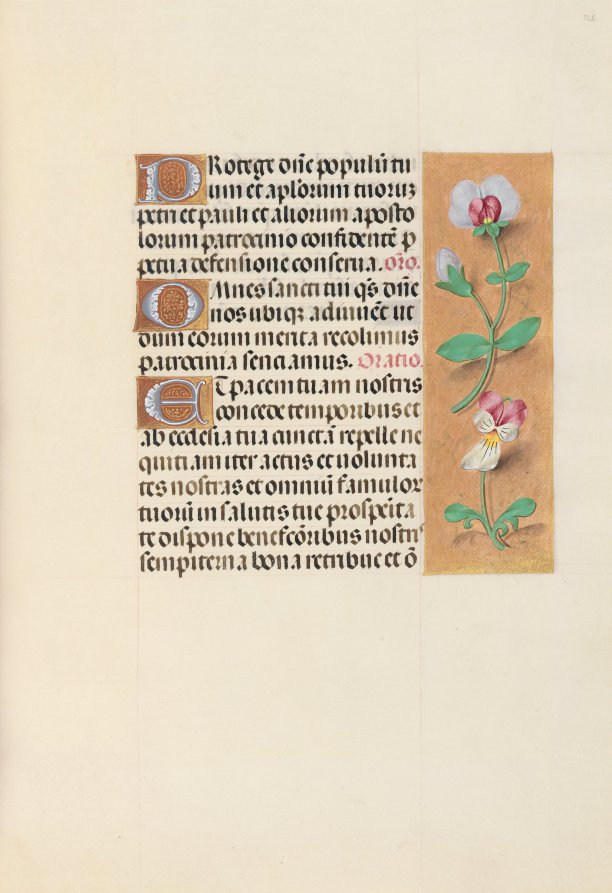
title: Hours of Queen Isabella the Catholic, Queen of Spain: Fol. 125r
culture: Flanders, Ghent and Bruges, late 15th century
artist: Master of the First Prayerbook of Maximillian (Flemish, c. 1444–1519)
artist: and Associates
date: c. 1500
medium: ink, tempera, and gold on vellum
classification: Bound Volume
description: This manuscript was illuminated by a circle of at least five highly organized manuscript painters active in the Flemish cities of Ghent and Bruges. The principal illuminator was Alexander Bening, who painted the majority of the book's miniatures. Manuscripts produced by this circle of artists are renowned for the decoration of their borders, which typically feature a rich variety of realistically-painted flowers, birds, and butterflies. This prayer book, called a book of hours, was intended not for a cleric, but for the private devotions of a lay person-in this case, Isabella the Catholic, Queen of Spain (1451-1504). Isabella's coat of arms embellishes the book's frontispiece. It is unlikely that the book was commissioned by the Queen herself; rather, she probably received it as a diplomatic gift from someone courting her patronage, perhaps Cardinal Francisco Jimenez de Cisneros. A Franciscan friar, Jimenez was dependent upon Isabella for his advancement, first to the post of Queen's confessor in 1492, and then to Archbishop of Toledo in 1495.